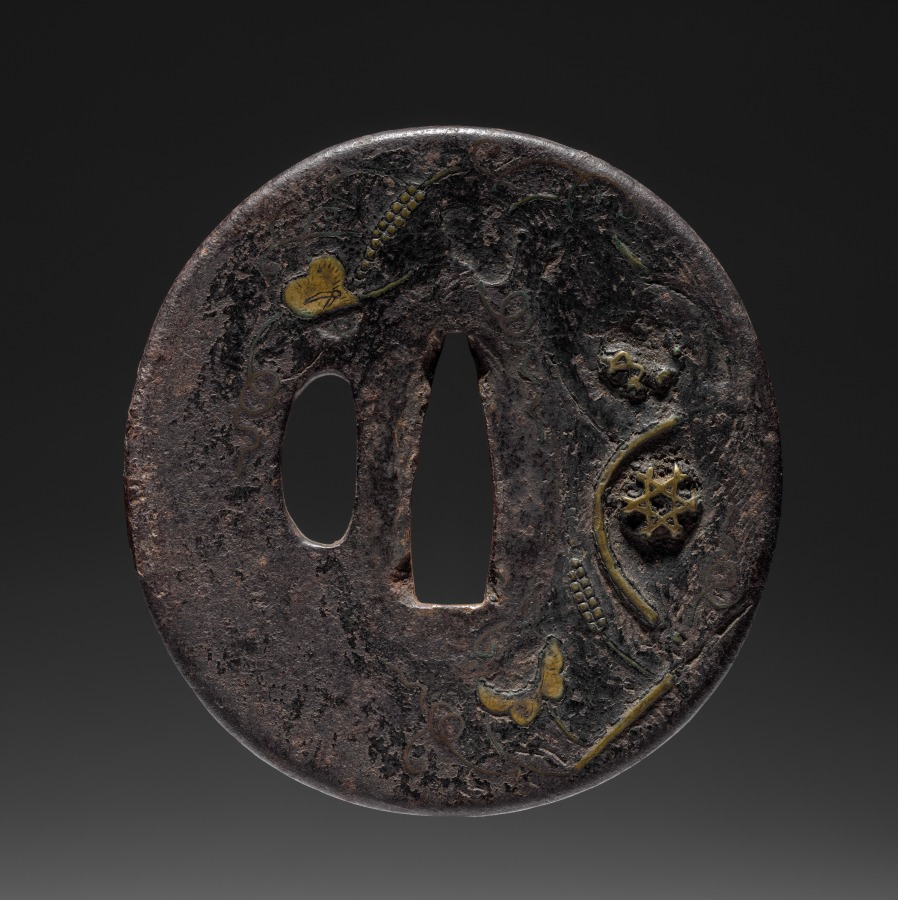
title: Sword Guard (Tsuba)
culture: Japan, possibly Edo period (1615-1868)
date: c. 1615–1868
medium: iron with brass inlay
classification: Arms and Armor